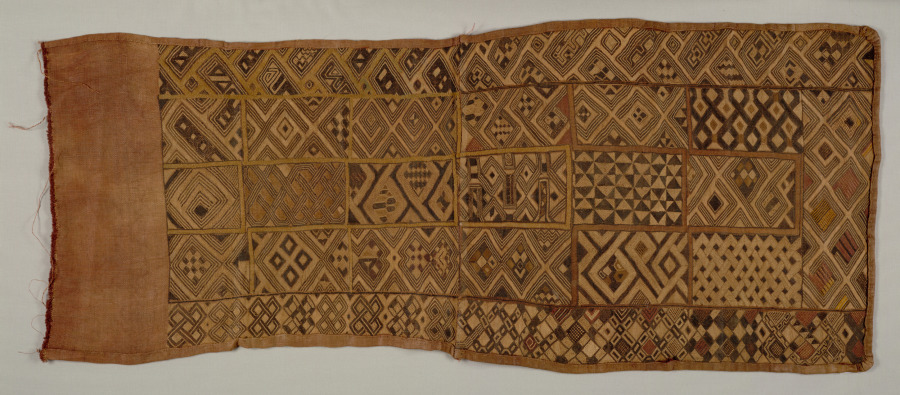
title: Embroidered Raffia Pile Cloth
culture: Africa, Central Africa, Democratic Republic of Congo, Kuba peoples, 20th century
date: 1900s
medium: Raffia and dye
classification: Textile